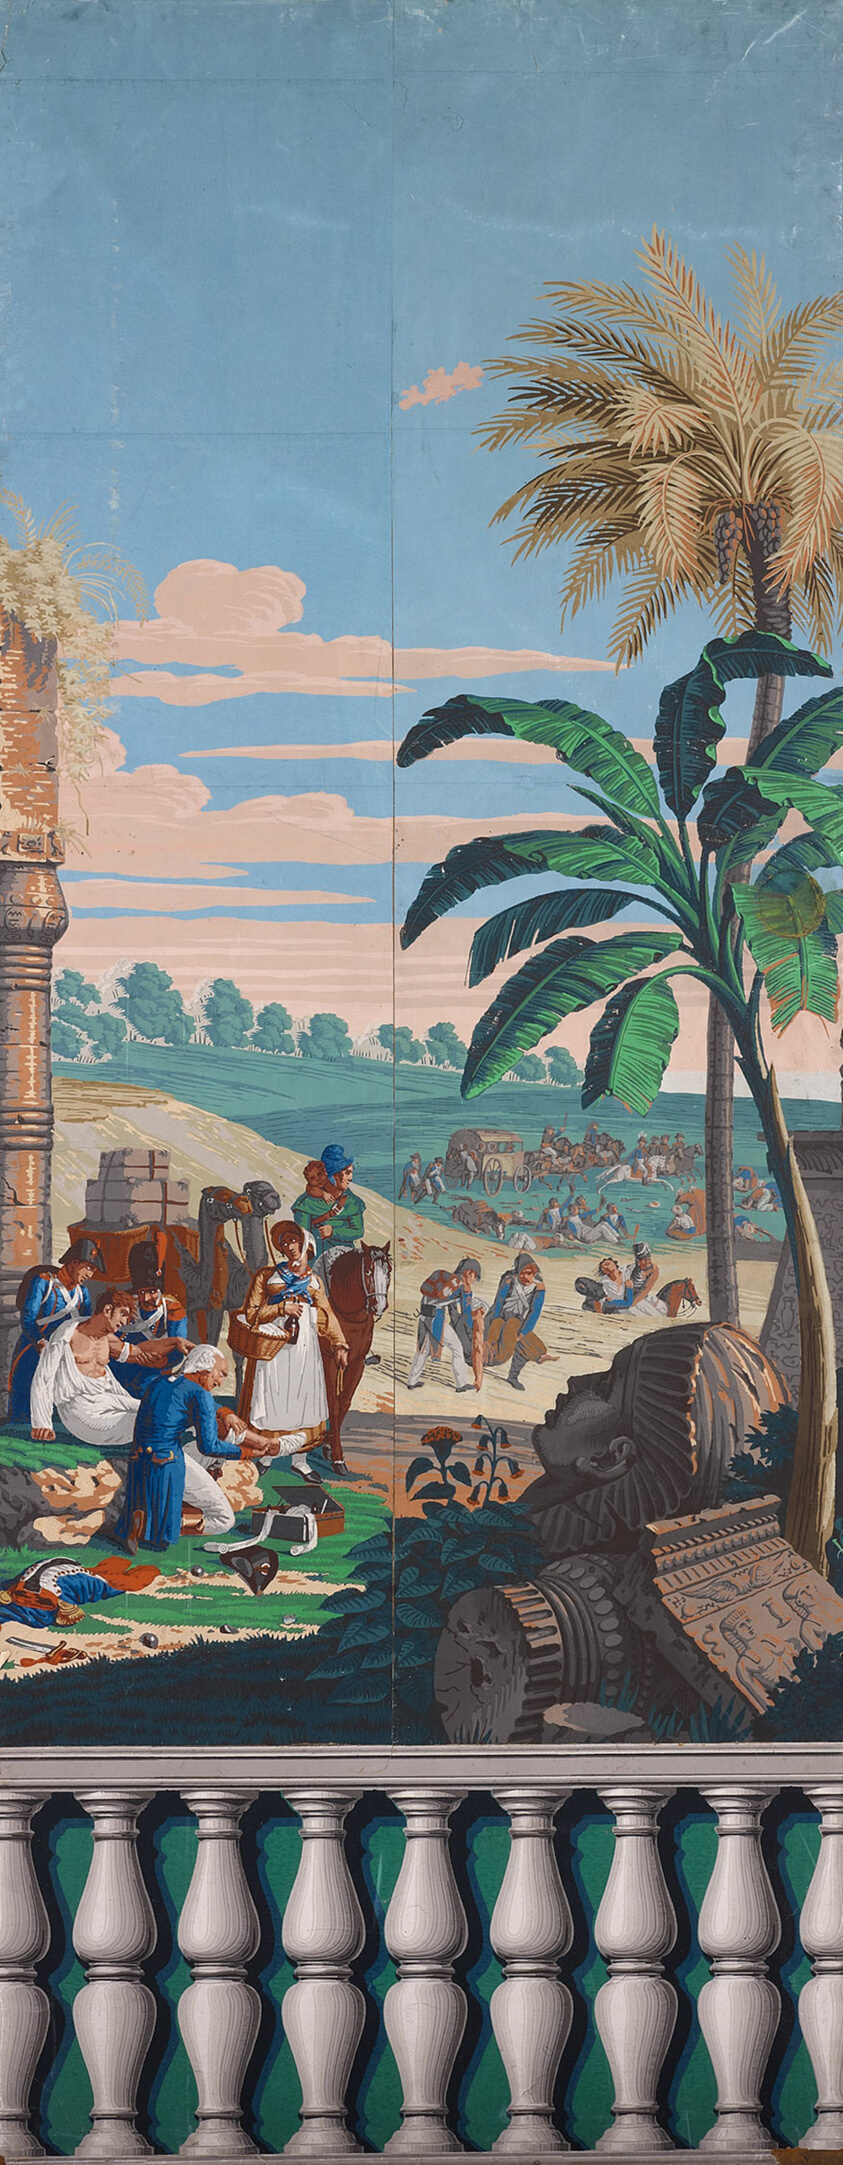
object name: Coverings and Hangings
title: Scenic Wallpaper: The Battle of Heliopolis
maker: Designed by Jean-Julien Deltil; Paris, France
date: First edition, c. 1818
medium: Block-printed, hand colored paper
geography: France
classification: wallpaper; paper; european decorative arts